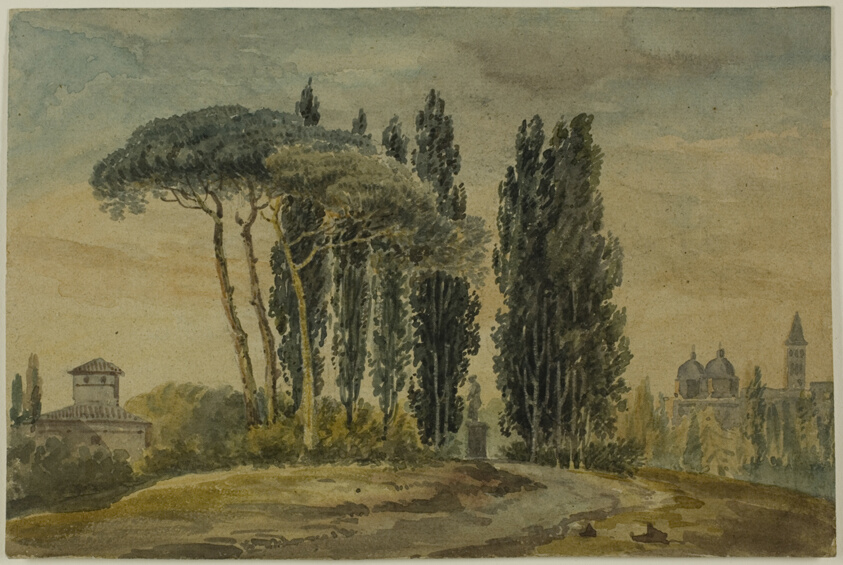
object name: Drawing and Watercolor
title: Villa Negroni, Rome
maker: Unknown artist (French, 19th century); possibly after John Robert Cozens (English, 1752-1799)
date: c. 1800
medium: Watercolor, over traces of graphite, on tan laid paper with blue fibers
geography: France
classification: watercolor; drawings (visual works); prints and drawing